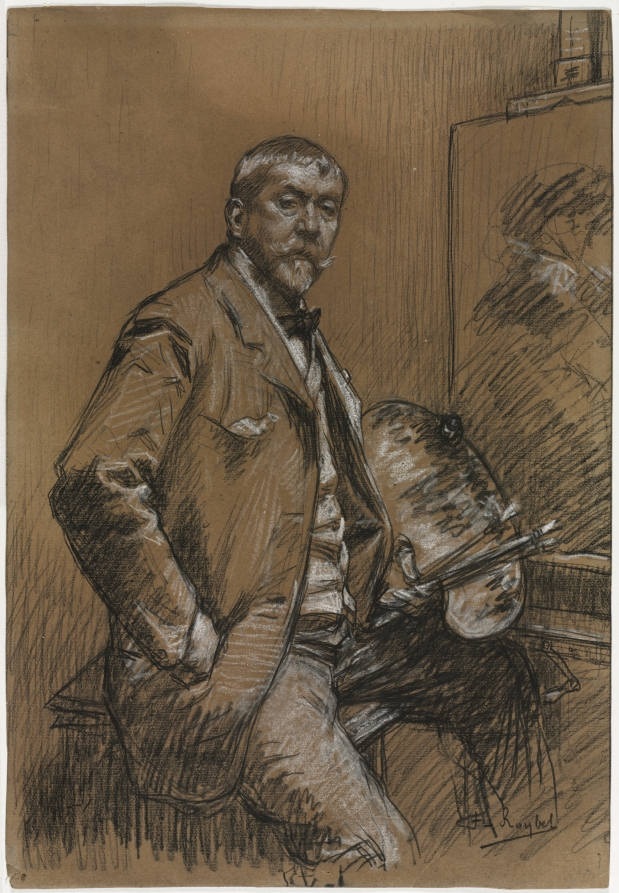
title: Self-Portrait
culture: France, 19th or 20th century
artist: Ferdinand Roybet (French, 1840–1920)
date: 1800s-1900s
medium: black chalk heightened with white chalk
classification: Drawing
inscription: Signed lower right in black chalk: F. Roybet